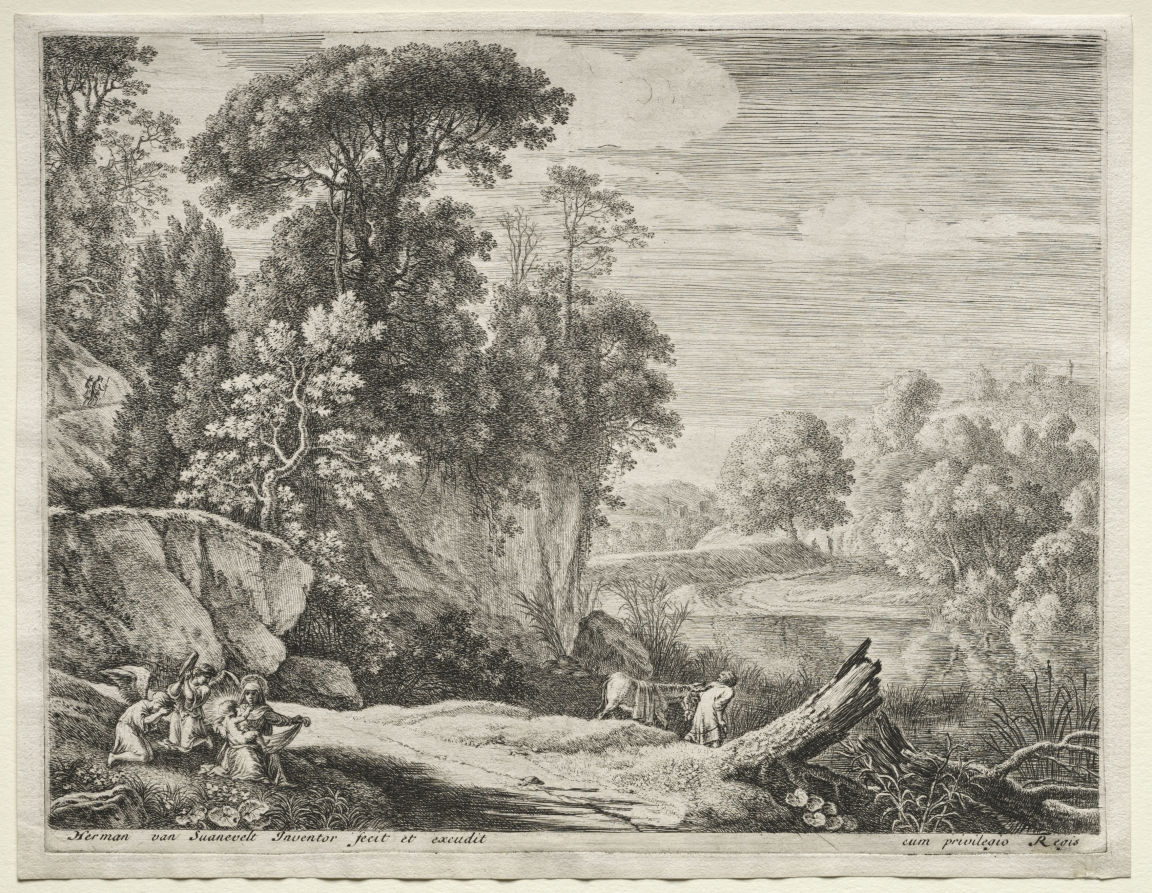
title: The Flight into Egypt: The Donkey Led to the River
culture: Netherlands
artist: Herman van Swanevelt (Dutch, c. 1600–1655)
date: c. 1652–54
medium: etching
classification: Print